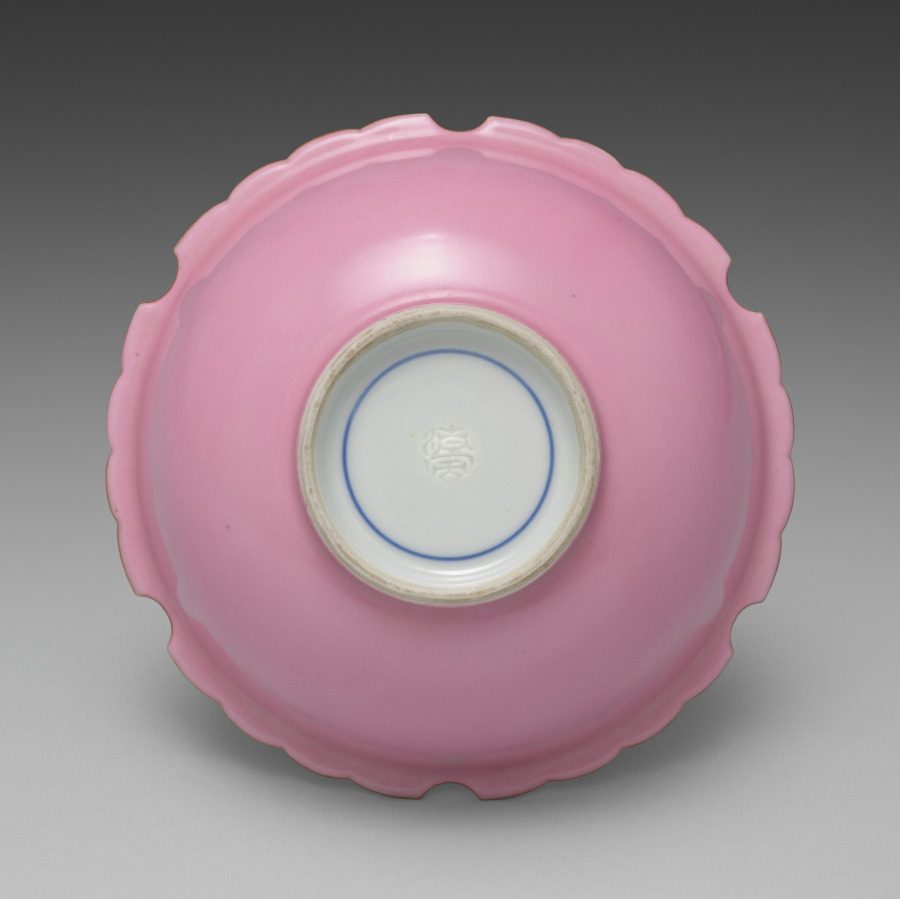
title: Dish from Snow-Flake Side Dishes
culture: Japan, Meiji period (1868–1912)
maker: Seifū Yohei III (Japanese, 1851–1914)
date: 1893–1914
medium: One from a set of six porcelain dishes; porcelain with lobed rims and pink glaze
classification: Ceramic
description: According to the box lid, this set of six side dishes, or mukōzuke, are “snow-flower style” (sekkashiki), having mouths shaped like snowflakes. Their mouths, which have six lobes and scalloped edges, are traced with brown iron oxide at the rim. The outside of each bowl is glazed with a very bright pink over the basin and foot, and the inside is left white. From directly above, one sees a snowflake-like shape, and from the side, they seem to float above a rosy ground.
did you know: The box for this set of dishes has an inscription on the side noting that they were for a person with the family name Nakamoto.